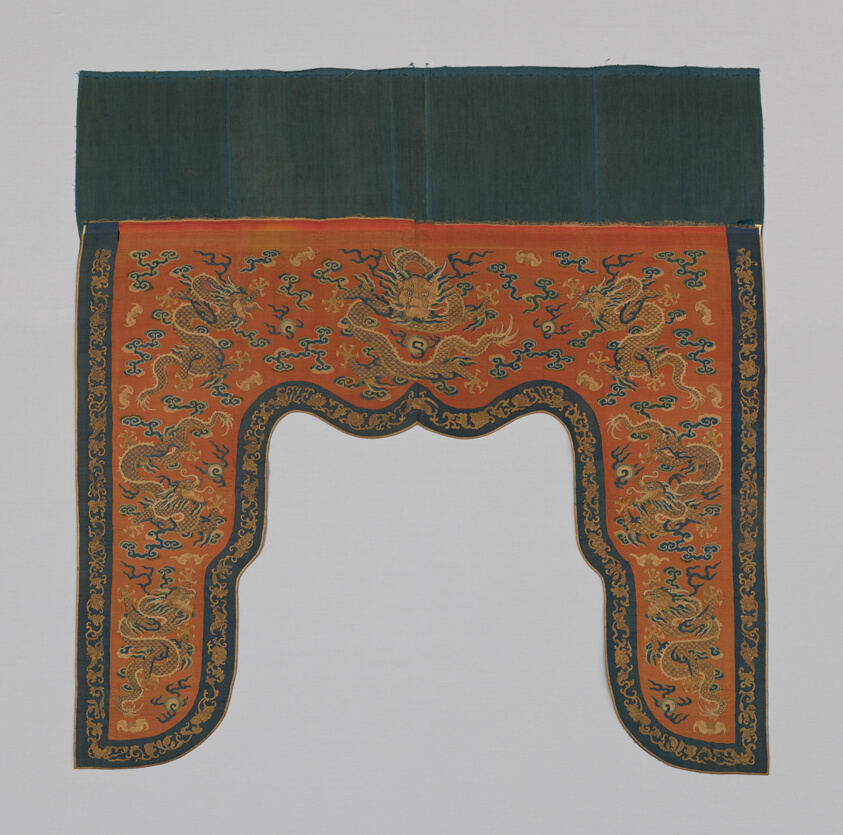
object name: Textile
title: Shrine Surround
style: kangxi, qing, Chinese (culture or style), East Asian, asian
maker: China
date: Qing dynasty (1644–1911), 1800-50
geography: China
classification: textile; weaving; needlework (visual works)